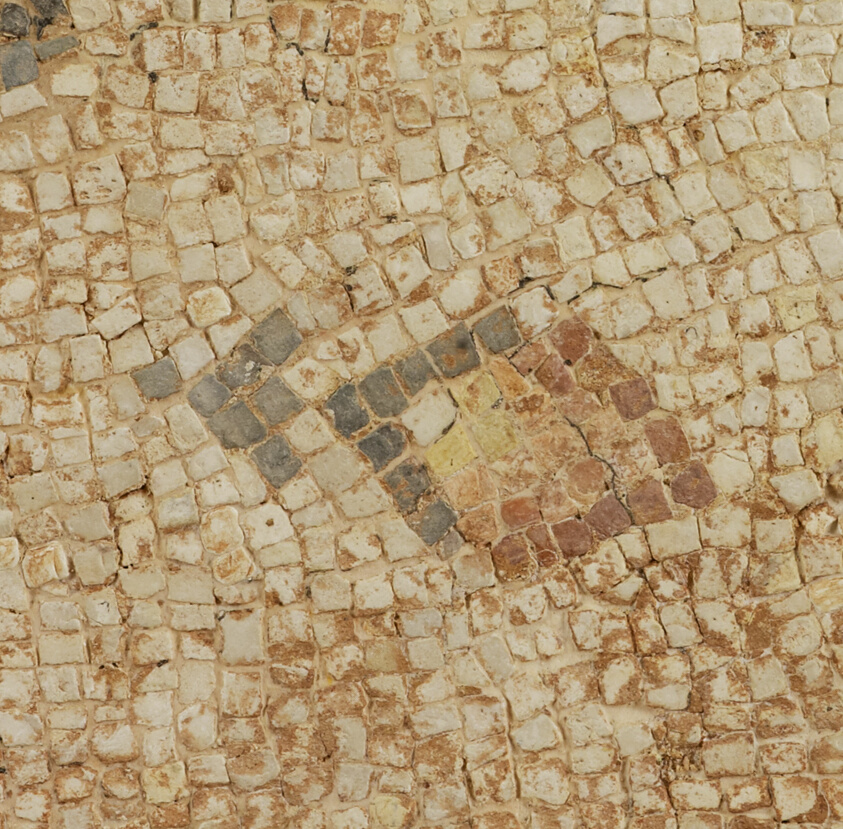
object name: Architectural fragment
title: Mosaic Fragment with Grazing Camel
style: byzantine, ancient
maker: Byzantine; Eastern Mediterranean, probably Syria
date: 5th century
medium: Stone in mortar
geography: Byzantine Empire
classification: architectural fragment; mosaic; ancient art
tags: animals